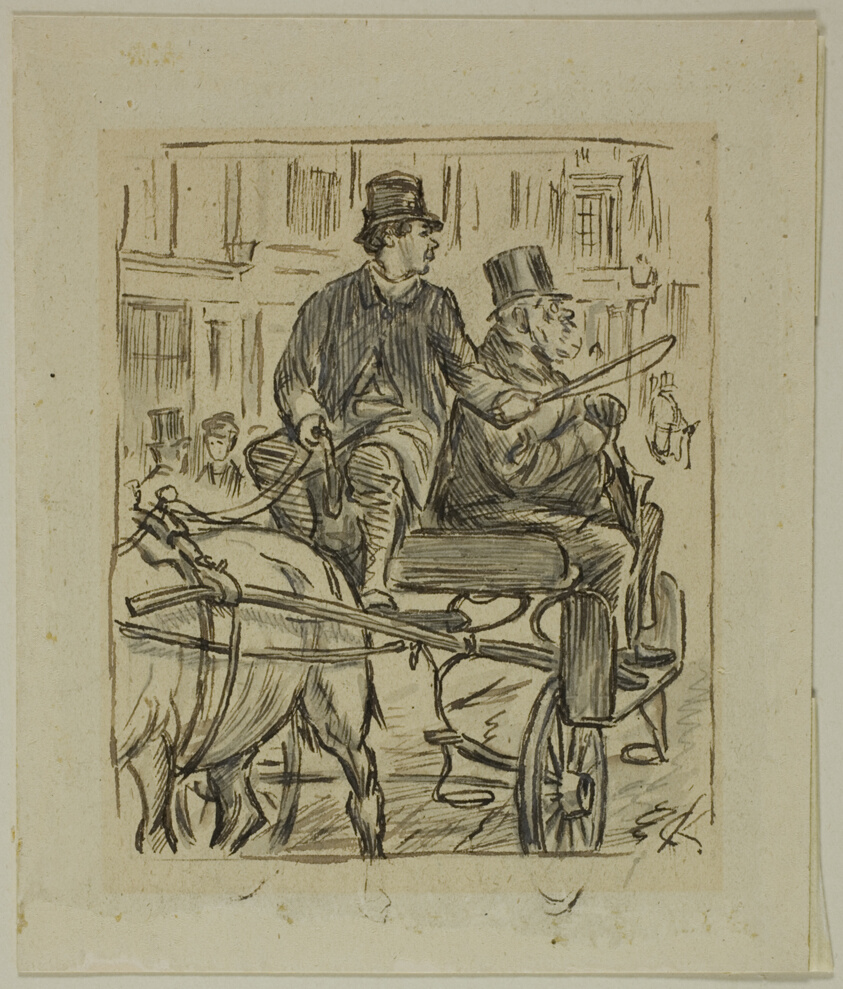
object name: Drawing and Watercolor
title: The Sights of Dublin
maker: Charles Samuel Keene (British, 1823-1891)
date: April 28, 1877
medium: Pen and brown ink, with brush and gray wash, over graphite, on cream wove card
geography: England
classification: pen and ink drawings; drawings (visual works); prints and drawing